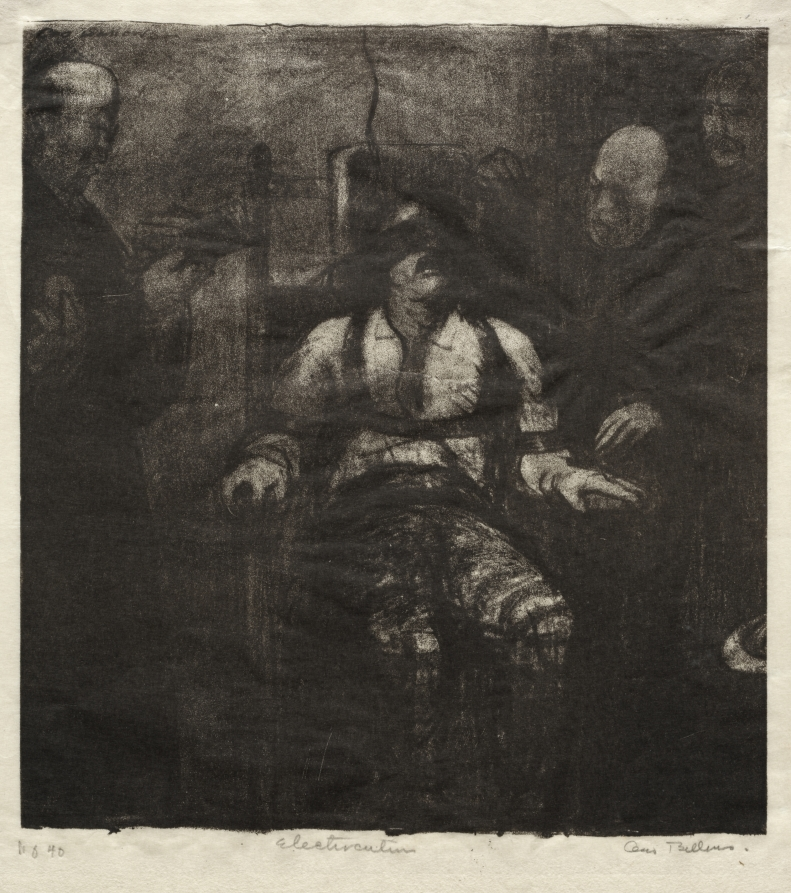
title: Electrocution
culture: America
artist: George Bellows (American, 1882–1925)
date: 1917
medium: lithograph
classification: Print